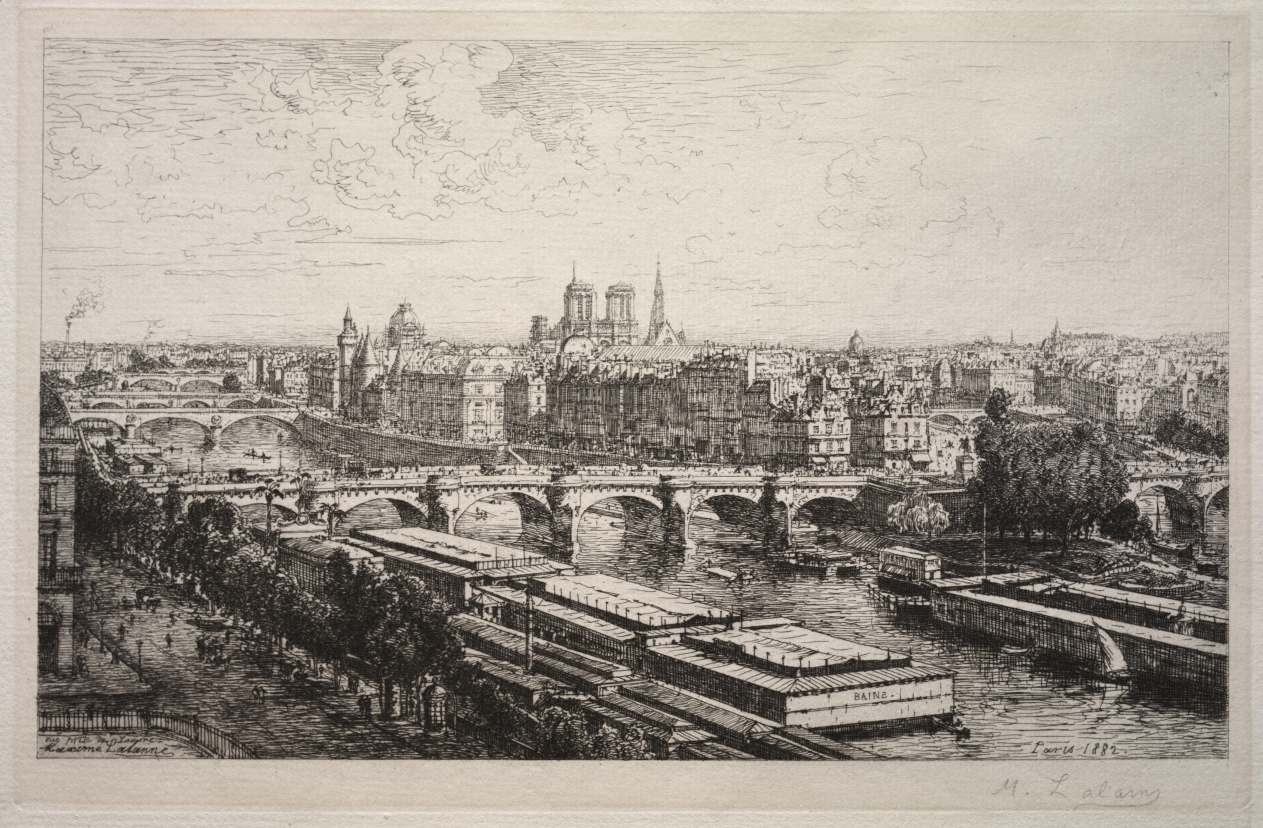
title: View from the Louvre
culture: France, 19th century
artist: Maxime Lalanne (French, 1827–1886)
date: 1882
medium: etching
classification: Print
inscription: lower right, in graphite: M.Lalanne